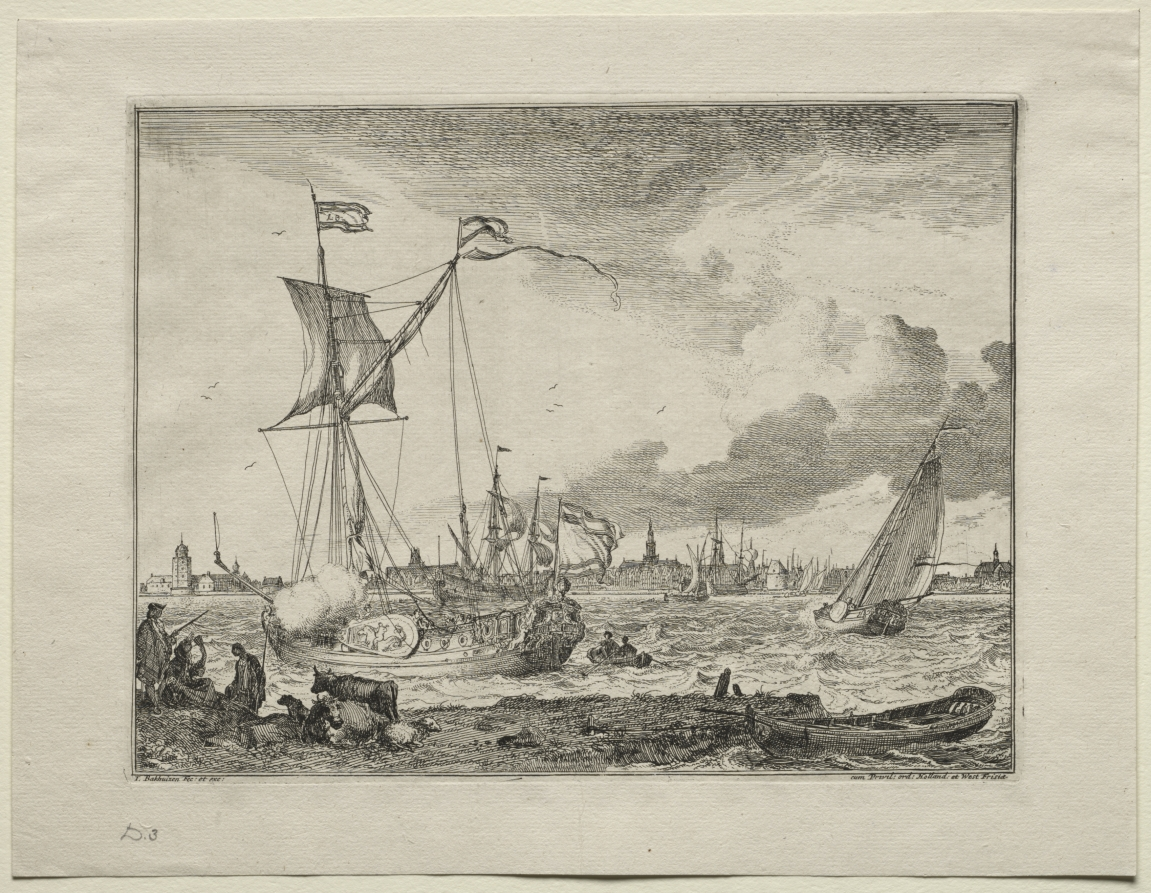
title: View of Amsterdam with Ships in Foreground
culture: Netherlands, early 18th century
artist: Ludolf Backhuysen (Dutch, 1631–1708)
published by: Ludolf Backhuysen (Dutch, 1631–1708)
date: 1701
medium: etching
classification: Portfolio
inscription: upper left, in plate: LB ; lower left, in plate: L. Bakhuizen Fec: et exc: ; lower right, in plate: cum Privil: ord: Holland: et West Frisiæ ; lower left, in graphite: D. 3